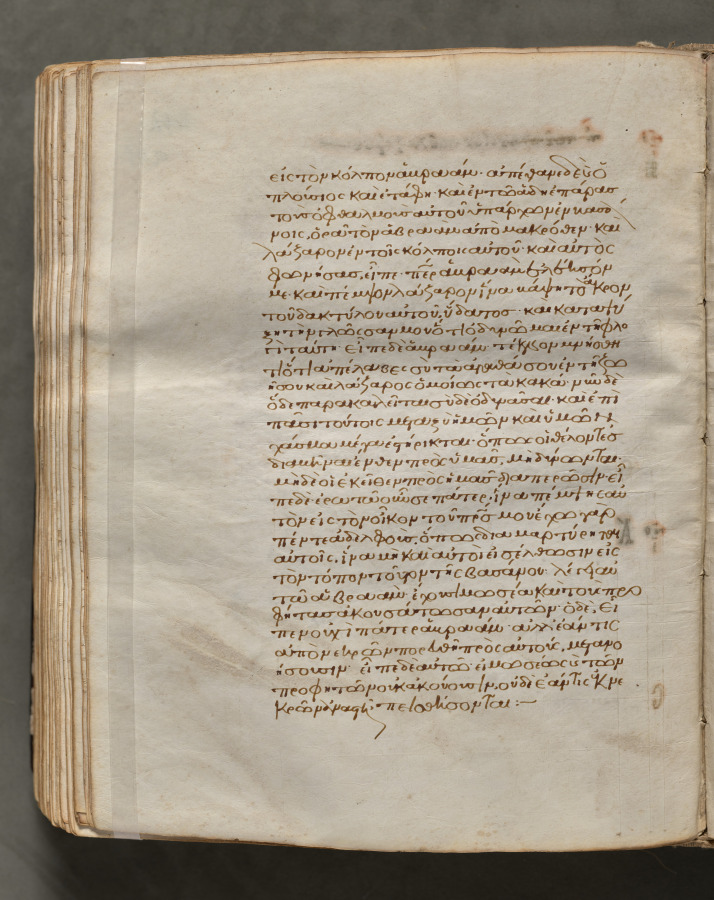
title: Text, folio 285 (verso), from a Gospel Book with Commentaries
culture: Byzantium, Constantinople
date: c. 1000–1100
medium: ink, tempera, and gold on vellum; leather binding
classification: Bound Volume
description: Each of the four gospels in this book opens on a page with brilliantly illuminated borders depicting the author of the text as well as birds—principally peacocks, symbols of the immortality of the soul—and fountains, representing the fountain of life and the salvation of the soul. This volume consists of 428 leaves with texts in Greek. Its level of sophistication suggests that it was probably written and decorated in a monastery in Constantinople.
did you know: Gospel books were carried in procession through Byzantine churches.